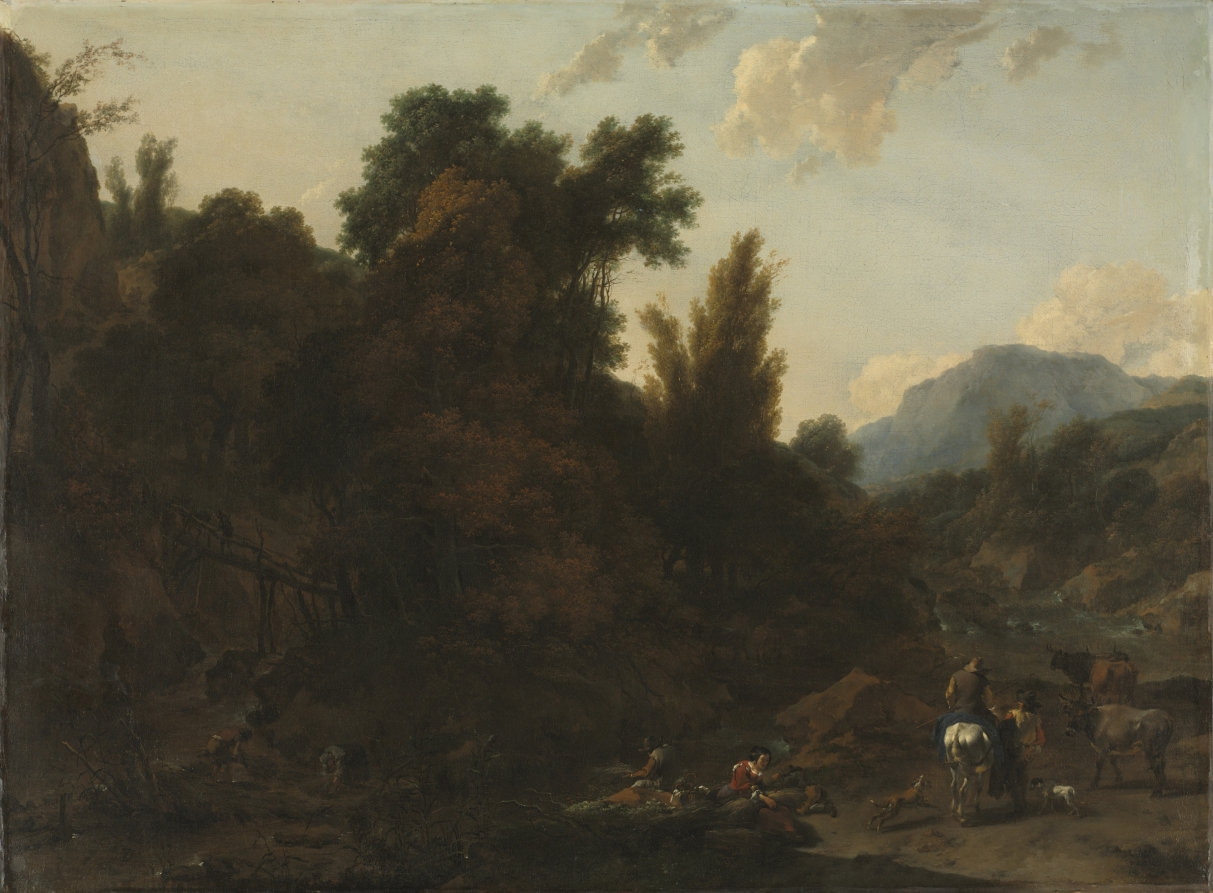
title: Rush Gatherers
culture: Netherlands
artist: Nicolaes Berchem (Dutch, 1620–1683)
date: 1657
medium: oil on canvas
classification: Painting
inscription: Signed lower left: "CBerchem / 1657 [CB in monogram]"